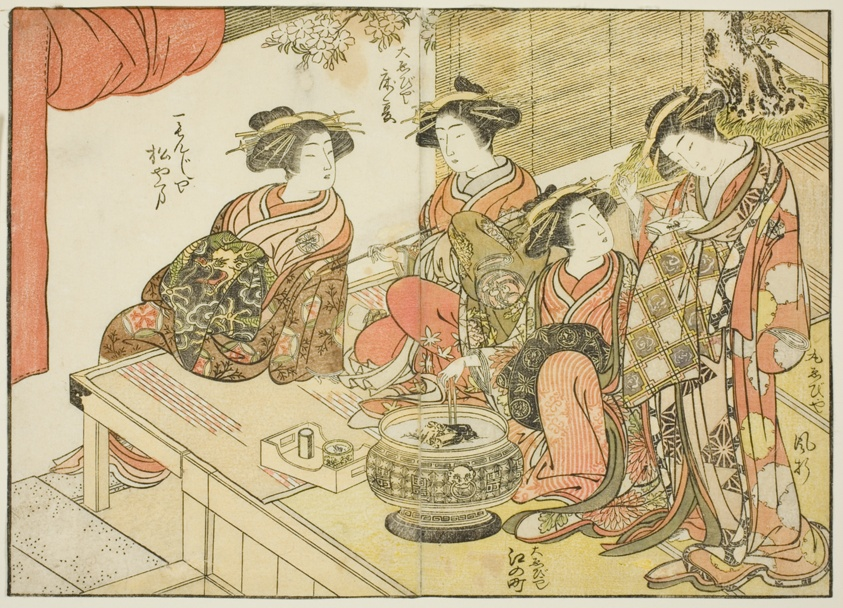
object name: Print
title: Four courtesans of various houses, from the book "Mirror of Beautiful Women of the Pleasure Quarters (Seiro bijin awase sugata kagami)," vol. 3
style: Japanese (culture or style)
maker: Katsukawa Shunsho; Japanese, 1726-1792; Kitao Shigemasa; Japanese, 1739-1820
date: 1776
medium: Color woodblock print; double-page illustration cut from a book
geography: Japan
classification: woodblock print; print; asian art